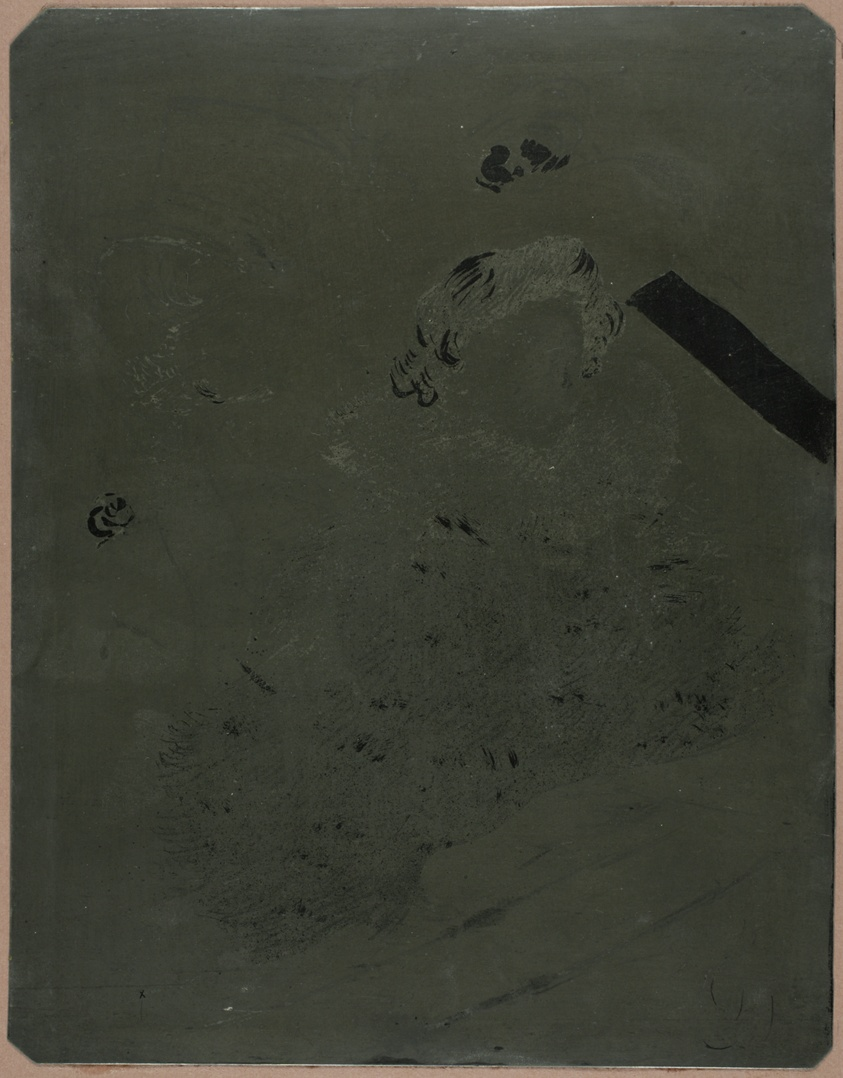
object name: Print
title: At the Concert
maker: Henri de Toulouse-Lautrec (French, 1864-1901)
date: 1896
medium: Zinc lithographic plate with corners removed and beveled edges, laid down on mauve board and taped to mat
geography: France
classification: zincograph; matrix; prints and drawing; print